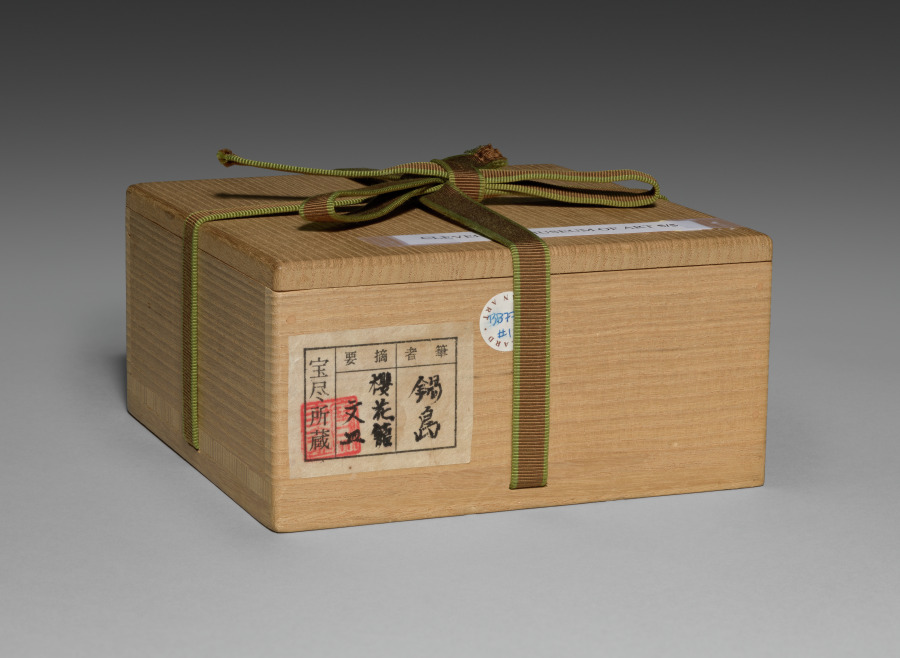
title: Small Dish (Kozara) with Cherry Blossoms in Baskets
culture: Japan, Edo period (1615–1868)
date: c. 1670‒1710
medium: Porcelain with underglaze blue and overglaze color enamel (Hizen ware, Nabeshima type)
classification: Ceramic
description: The cherry blossoms and stylized wave pattern that appear on this dish remain popular today.